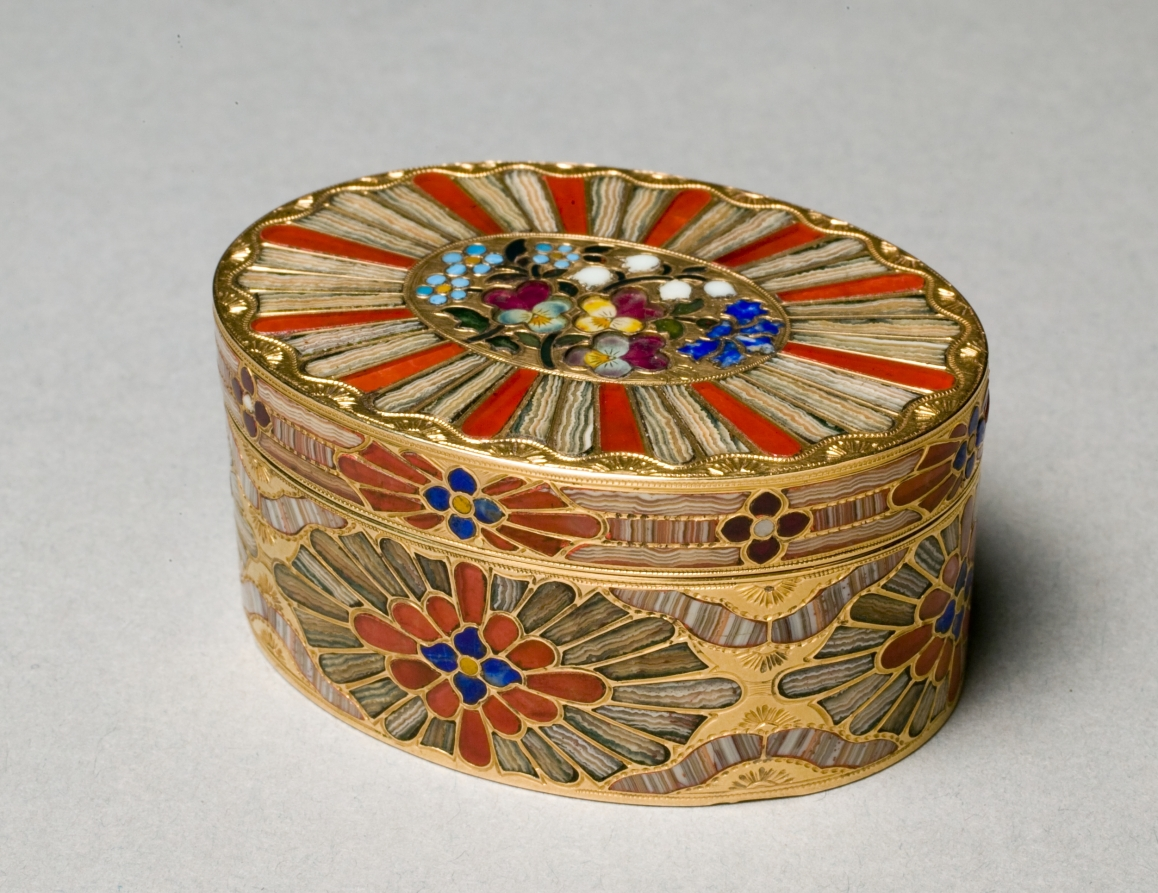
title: Snuff Box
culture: Germany, Dresden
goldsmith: Johann Christian Neuber (German, 1736–1808; active Dresden 1762-c.1800)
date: c. 1780–90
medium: gold, multi-colored hardstone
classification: Miscellaneous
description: Snuff was a scented form of tobacco powder, traditionally sniffed for maximum effect. The practice of inhaling a pinch of snuff was common in England during the 1600s and became widespread in other countries in the 1700s. The demand for decorated snuffboxes, considered valuable gifts, increased as the practice spread. Some were small enough to fit in a waistcoat pocket and gave 18th-century craftsmen an opportunity to execute rich and elaborate designs on a small scale. One of the most talented German goldsmiths, Johann Christian Neuber, was particularly adept at cutting and insetting rare hardstones sourced from the rich mines of northern Germany. He created a kaleidoscope of color on every surface of this little box in radiant patterns. Neuber's work was so renowned that he was made court jeweler to the elector of Saxony, Frederick Augustus the Third (1750-1827) in 1775.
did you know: Because of his use of rare hardstones cut in tiny intricate patterns, Johann Christian Neuber's works, including small ones such as this snuffbox, are highly prized by museums and collectors alike.